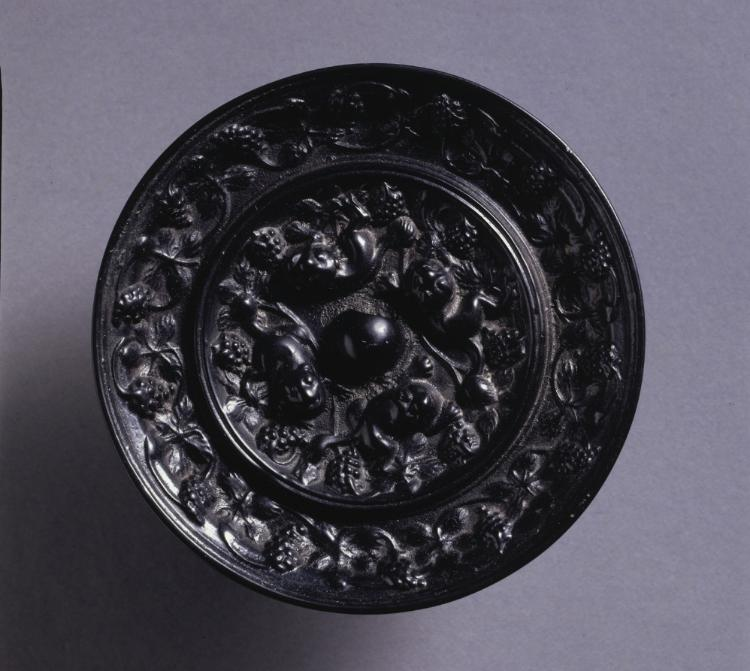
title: Animal-and-Grape Mirror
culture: China, Tang dynasty (618-907)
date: mid 600s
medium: bronze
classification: Metalwork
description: Animal-and-Grape Mirror, mid-7th century ad China, Tang dynasty (ad 618-907) CMA 1995.356 [Cat. no. 53]